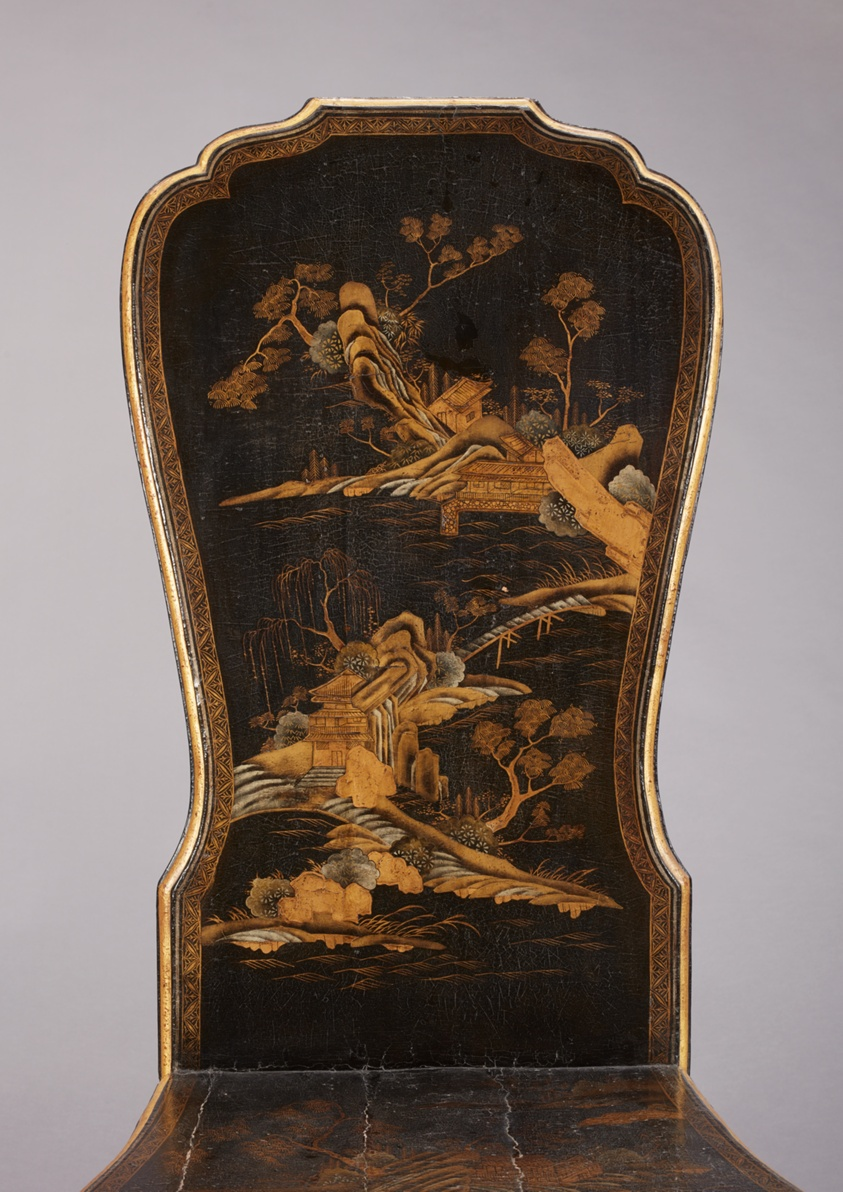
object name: Furniture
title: Pair of Hall Chairs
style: Baroque, chinoiserie, georgian, 18th Century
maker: China (lacquer back and seat panels) and England (frame)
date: 1720-30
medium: Frames: gilt gesso on beechwood; Backs and seats: lacquered and gilt Chinese softwood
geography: England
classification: chair; furniture; seating; european decorative arts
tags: landscapes, rocks